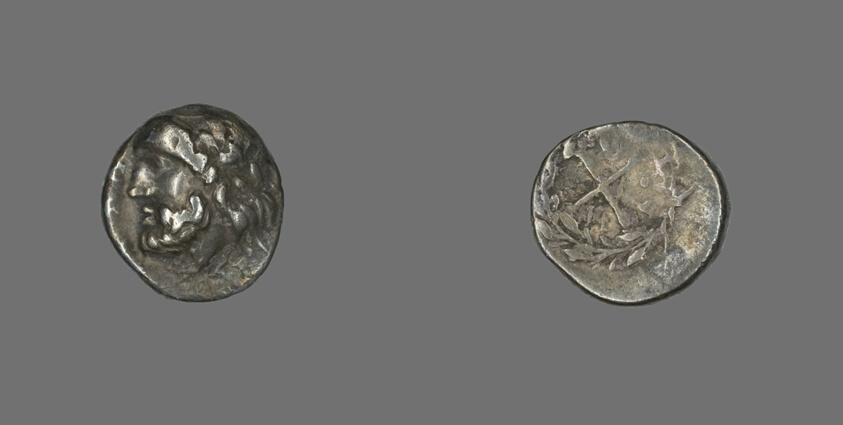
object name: Coin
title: Hemidrachm (Coin) Depicting the God Zeus Amarios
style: greek, ancient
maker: Greek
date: 280-146 BCE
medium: Silver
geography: Ancient Greece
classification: coin; ancient art